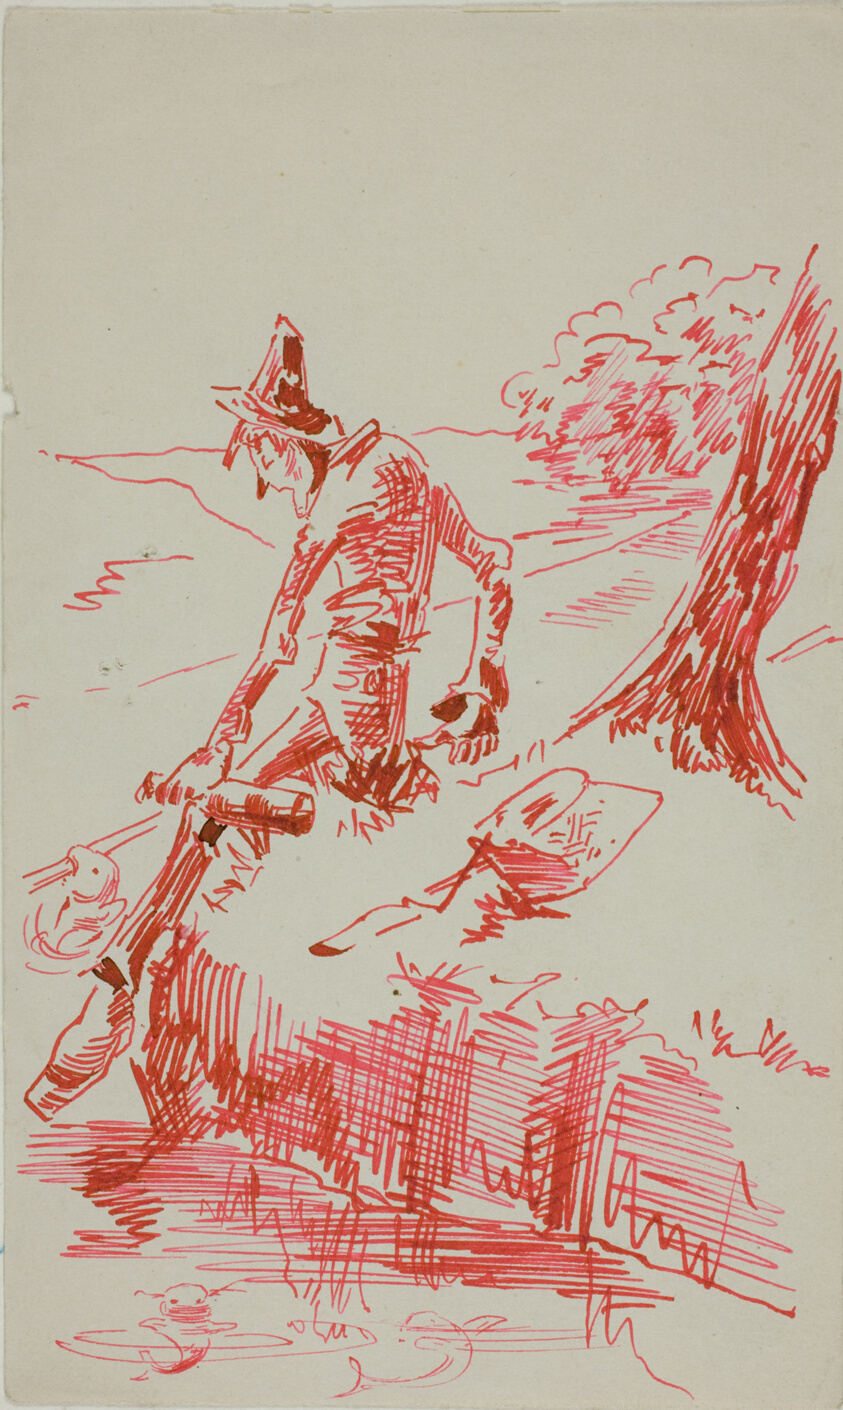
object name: Drawing and Watercolor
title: Man Fishing and Holding Bottle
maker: Anders Zorn (Swedish, 1860-1920)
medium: Pen and red ink, on ivory wove paper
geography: Sweden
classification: pen and ink drawings; drawings (visual works); prints and drawing